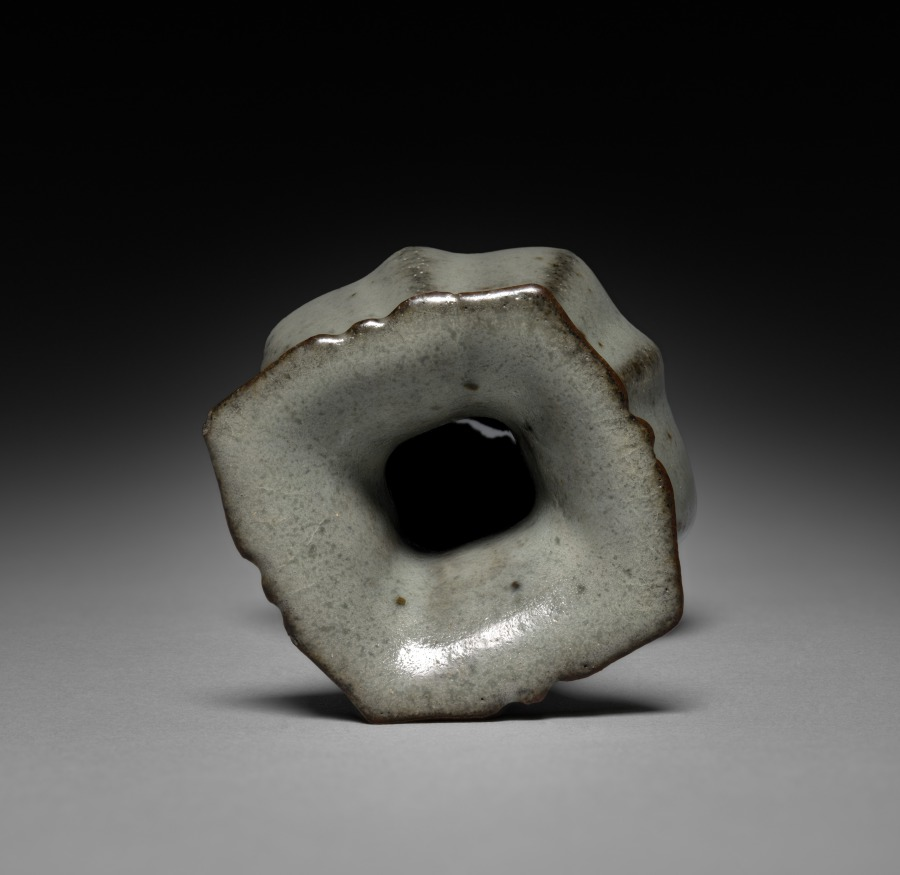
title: Lobed Vase: Guan ware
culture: China, Hangzhou, Suburban Altar Kiln, Southern Song dynasty (1127-1279)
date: 1127–1279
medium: glazed reddish-brown porcelain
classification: Ceramic